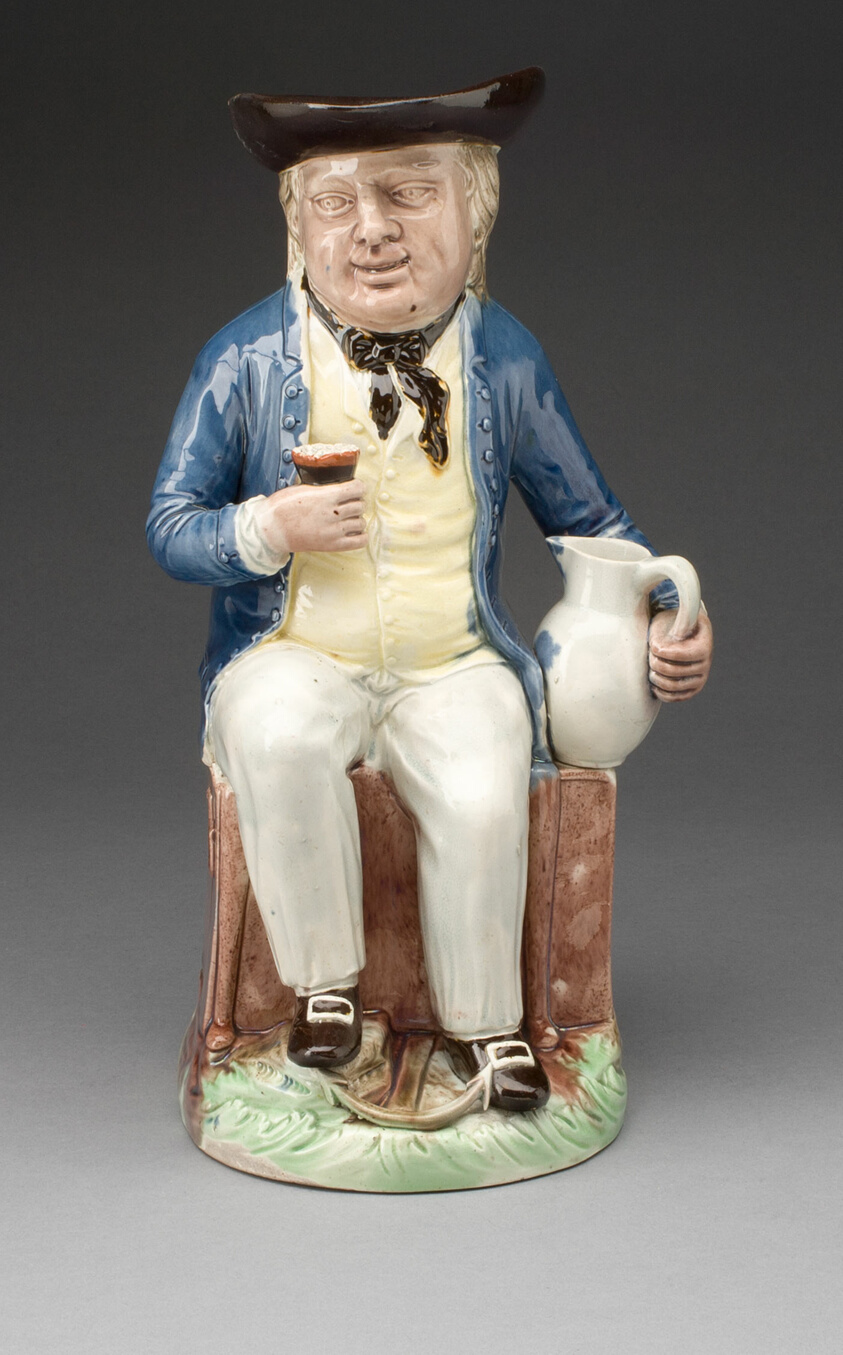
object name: Ceramics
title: "Rodney's Sailor" Toby Jug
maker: Ralph Wood; English, 1748-95; England, Burslem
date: 1780/90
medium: Lead-glazed earthenware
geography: Staffordshire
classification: earthenware; lead-glazed earthenware; european decorative arts; ceramics